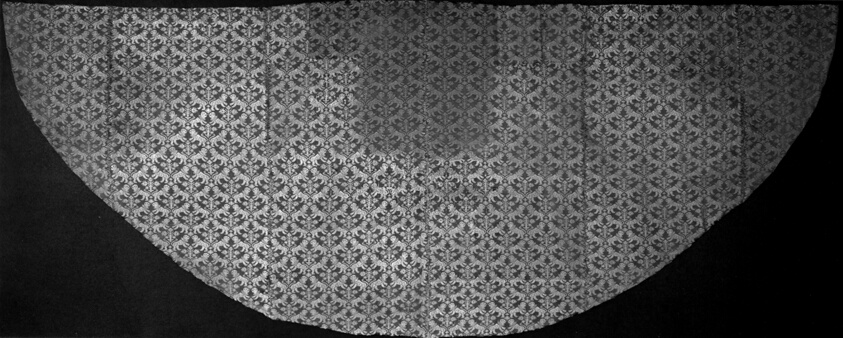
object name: Textile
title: Cope (without Orphrey or Hood)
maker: Italy, Florence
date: 1575/1600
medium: Silk, damask weave; five panels joined; lined with linen, plain weave (original lining)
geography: Florence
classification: textile; costume; weaving; liturgical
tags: lions, animals, lattices